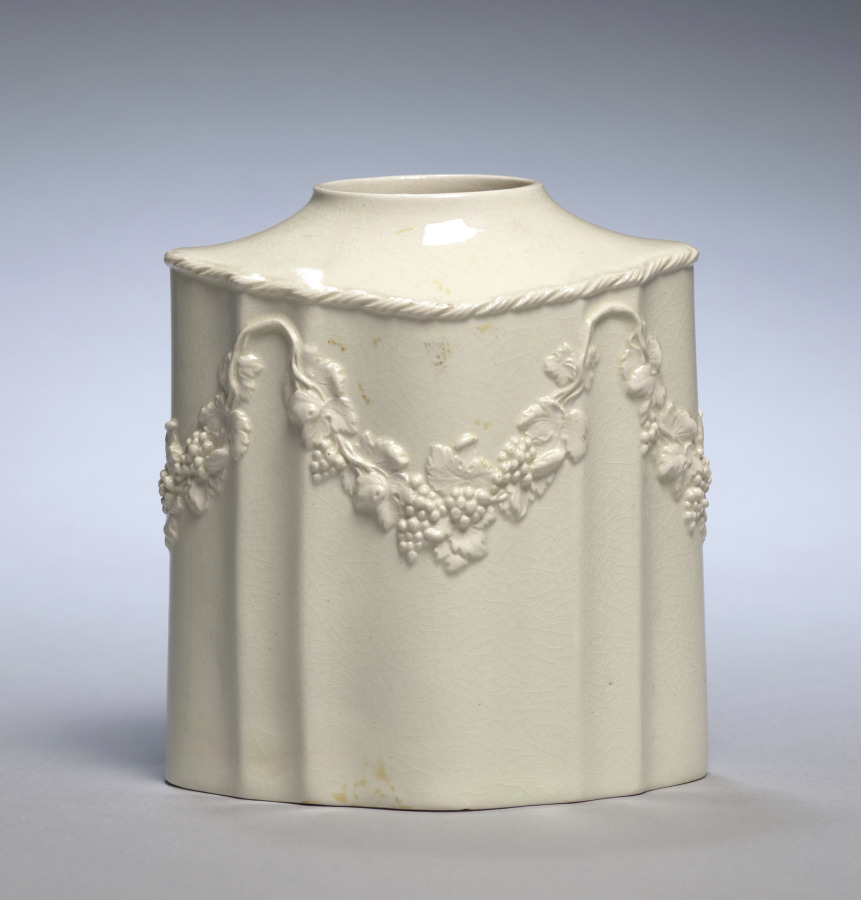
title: Teacaddy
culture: England, Staffordshire, 18th century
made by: Wedgwood Factory (British)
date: late 1700s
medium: cream-colored earthenware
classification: Ceramic